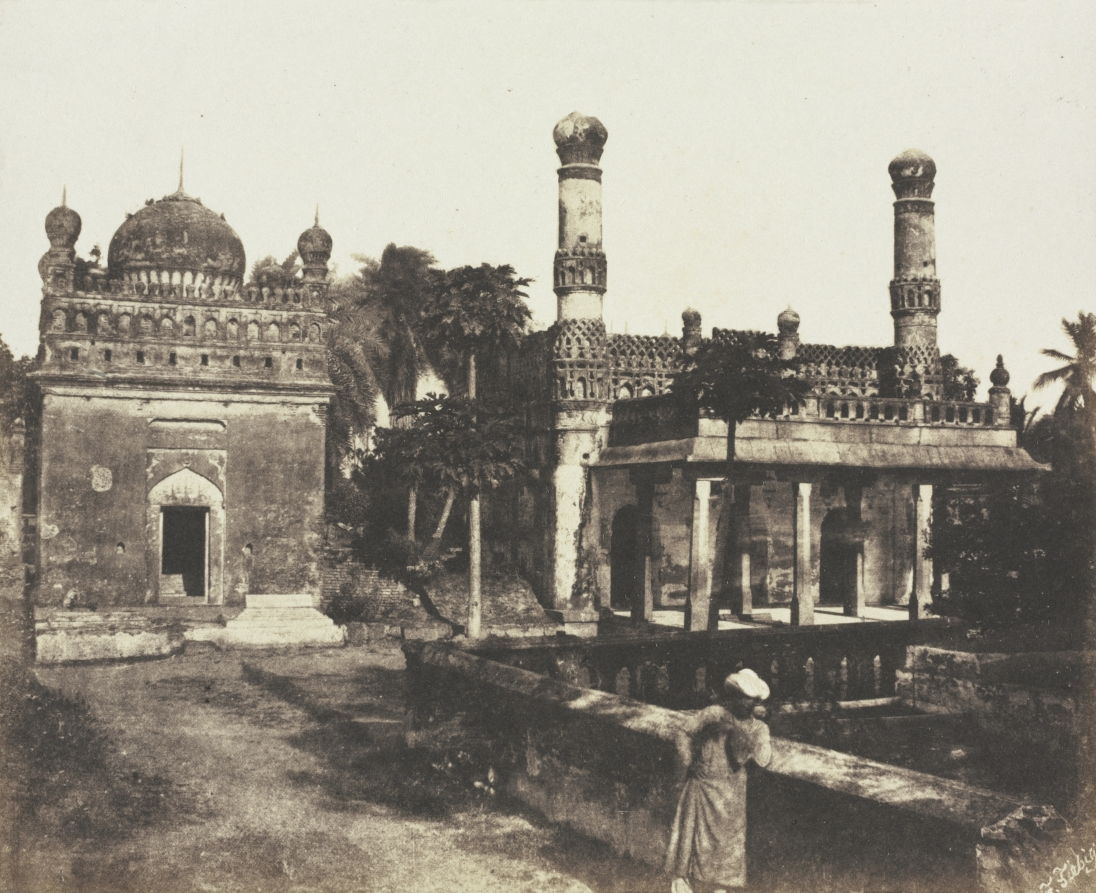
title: Mosque, Madras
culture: Germany, 19th century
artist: Frederick Fiebig (German)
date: 1851–1852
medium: salted paper print from wet collodion negative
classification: Photograph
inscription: printed in image in lower right corner: "F. Fiebig" written in black on label on mount: "56.Mosque-Madras" written in pencil on verso: "22898/14" "56"